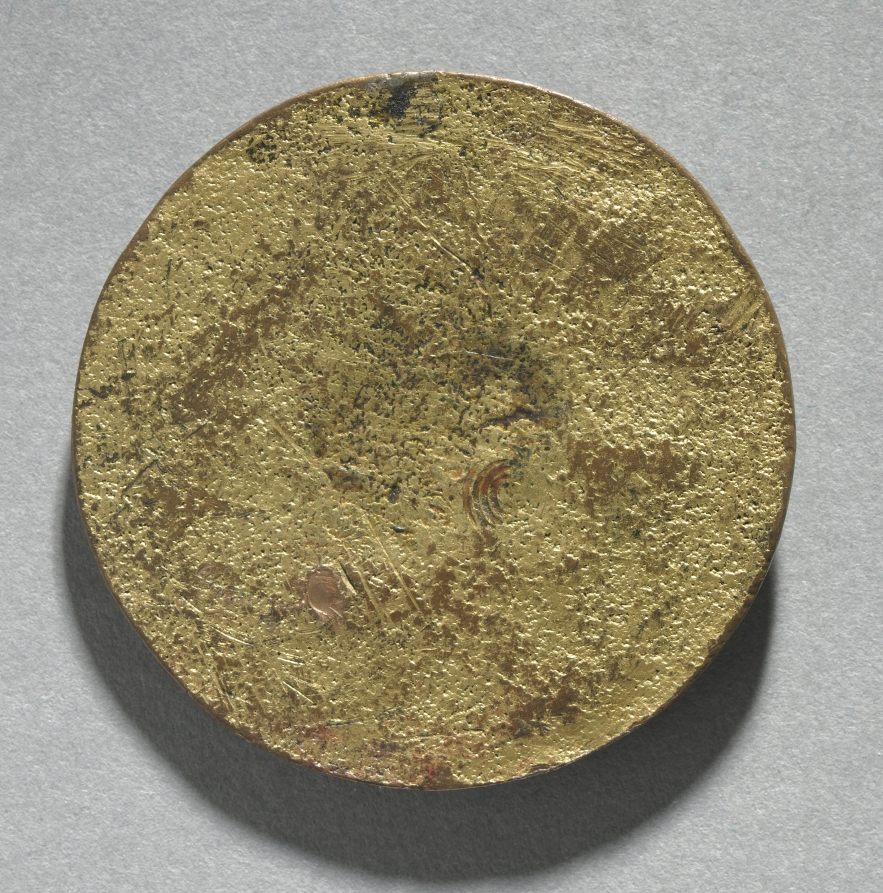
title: Saint Martin and the Beggar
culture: Germany, early 16th century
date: early 1500s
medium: gilt bronze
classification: Sculpture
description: This plate is an appliqué seal, intended as a decorative element for a garment or possibly as a simple pilgrimage medallion. The work tells a story of charity. It depicts Martin of Tours, a French soldier of the fourth century who, when accosted by a beggar at the gates of Amiens, cut a portion of his cloak and gave it to him. Saint Martin is depicted midway through cutting away his cloak with his saber. The bronze is often attributed to an artist in the northern Netherlands, which is due in part to the popularity of several motifs there at the turn of the sixteenth century. The depiction of plant life, for instance, is highly detailed, recalling Netherlandish scenes of the time. A similar seal (now in Berlin) belonged to Johann Potken, who was the provost of the Monastery of Saint Martin. This monastery was located in the now-German city of Emmerich am Rhein, not far from the Dutch city of Nijmegen. Despite the seal's Germanic attributes, the figures' physical qualities suggest the artist's awareness of Italian Renaissance art.